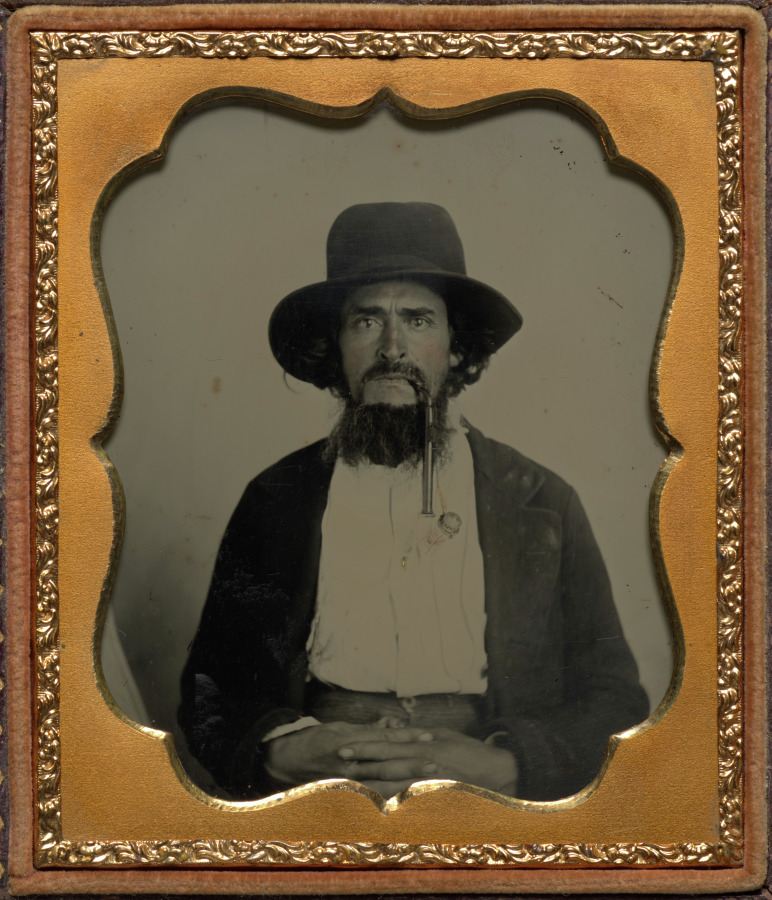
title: Urban Worker Smoking Tyrolean Pipe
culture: America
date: c. 1855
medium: ambrotype, sixth plate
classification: Photograph